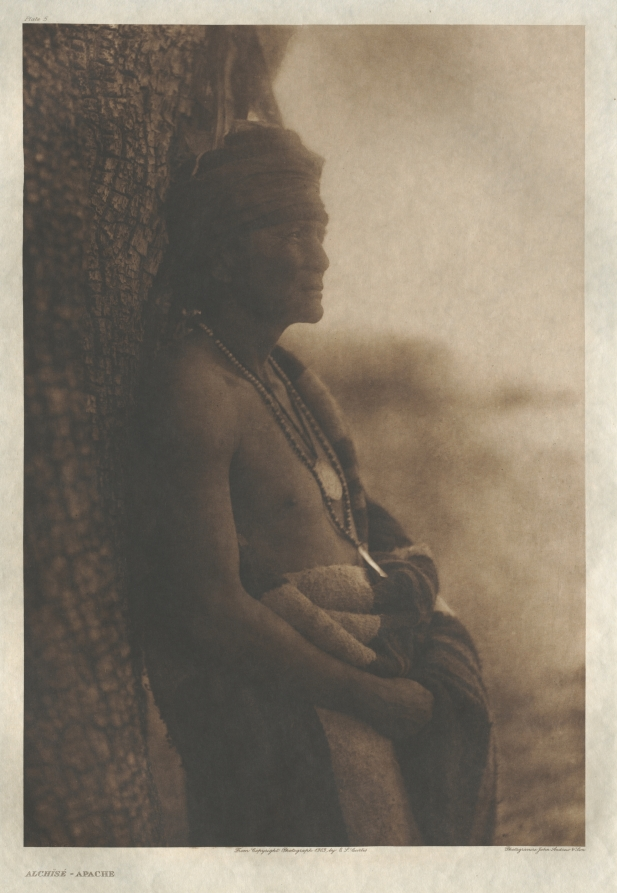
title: Portfolio I, Plate 5: Alchisé-Apache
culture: America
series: The North American Indian: being a series of Portfolios picturing and describing the Indians of the United States, the Dominion of Canada, and Alaska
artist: Edward S. Curtis (American, 1868–1952)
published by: The University Press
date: 1903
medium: photogravure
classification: Portfolio